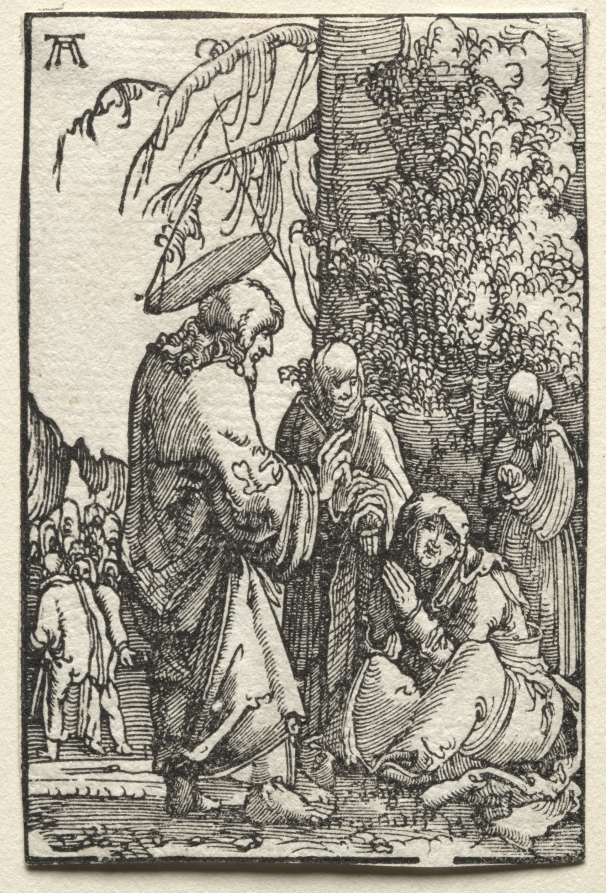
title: The Fall and Redemption of Man: Christ Taking Leave of His Mother before the Passion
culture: Germany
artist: Albrecht Altdorfer (German, c. 1480–1538)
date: c. 1515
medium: woodcut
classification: Print